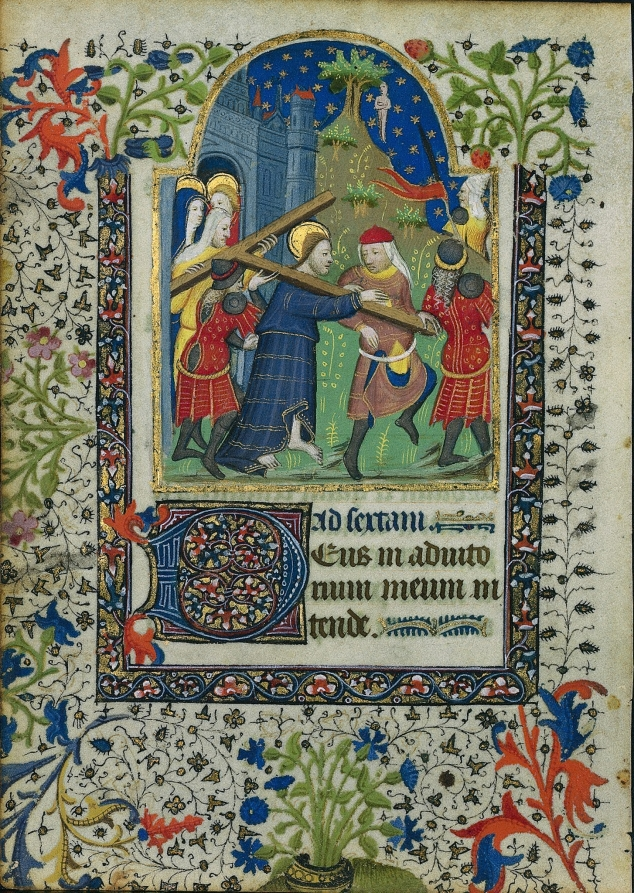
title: Leaf from a Book of Hours: Christ Carrying the Cross (Sext, Hours of the Cross)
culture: France, Brittany(?), 15th century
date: c. 1410–1420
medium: ink, tempera and gold on vellum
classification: Manuscript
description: Within books of hours, the Hours of the Cross normally received only one miniature, a Crucifixion, as its introduction. There are exceptions, however, and in some books of hours a Passion cycle of seven miniatures, one for each hour (except Lauds), might be found. The present leaf with its miniature of Christ Carrying the Cross would have been part of such a cycle of pictures in which it introduced the Hour of Sext (confirmed by the rubric, Ad Sextam). The composition shows Christ laboring to support the weight of the cross as he journeys to Calvary. The Virgin and Saint John appear at the far left as the group exits the gates of Jerusalem. In the background, the body of Judas is seen suspended from a tree high upon a hill.